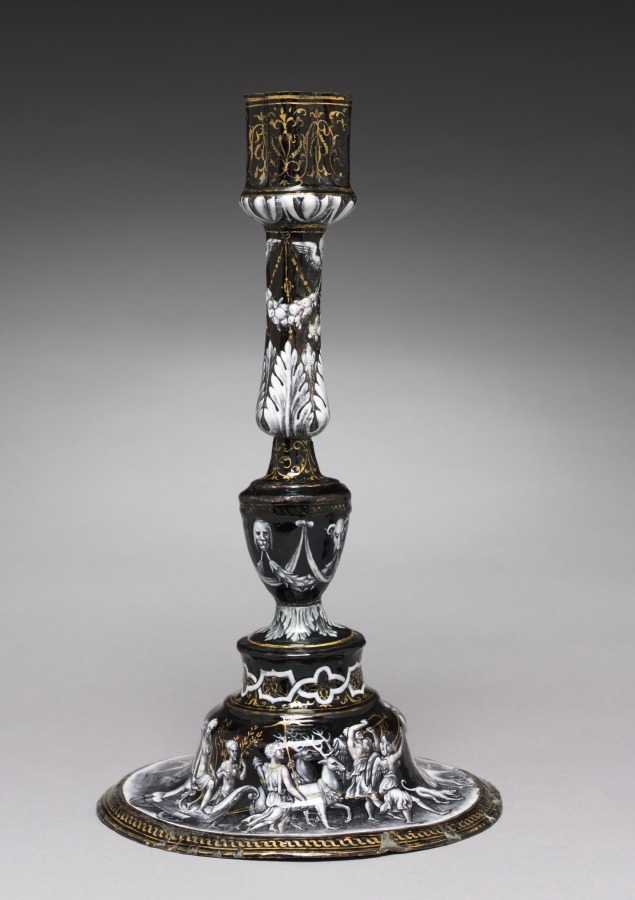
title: Candlesticks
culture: France, Limoges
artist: attributed to Jean II de Court (French, before 1583)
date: c. 1565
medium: painted enamel (grisaille) on copper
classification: Enamel